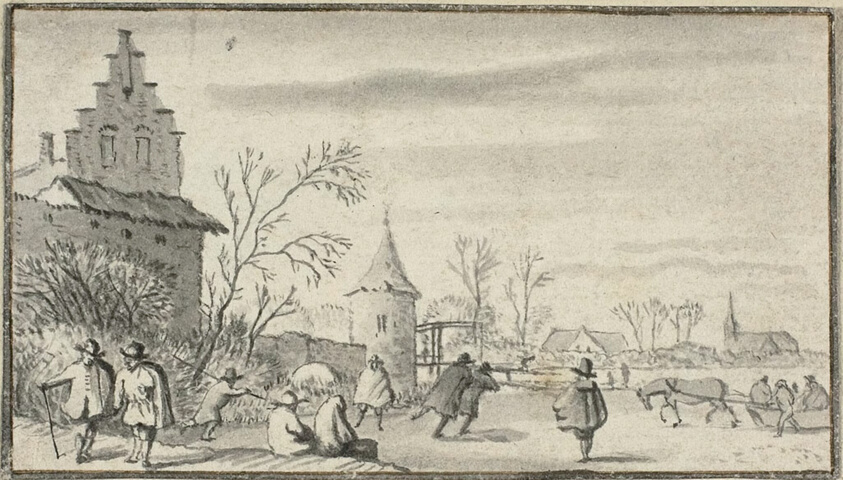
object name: Drawing and Watercolor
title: Skaters on Pond Outside Town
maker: Attributed to Allart van Everdingen; Dutch, 1621-1675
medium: Brush and gray wash over traces of black chalk on ivory laid paper, tipped onto laid paper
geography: Holland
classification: ink or chalk wash; drawings (visual works); prints and drawing